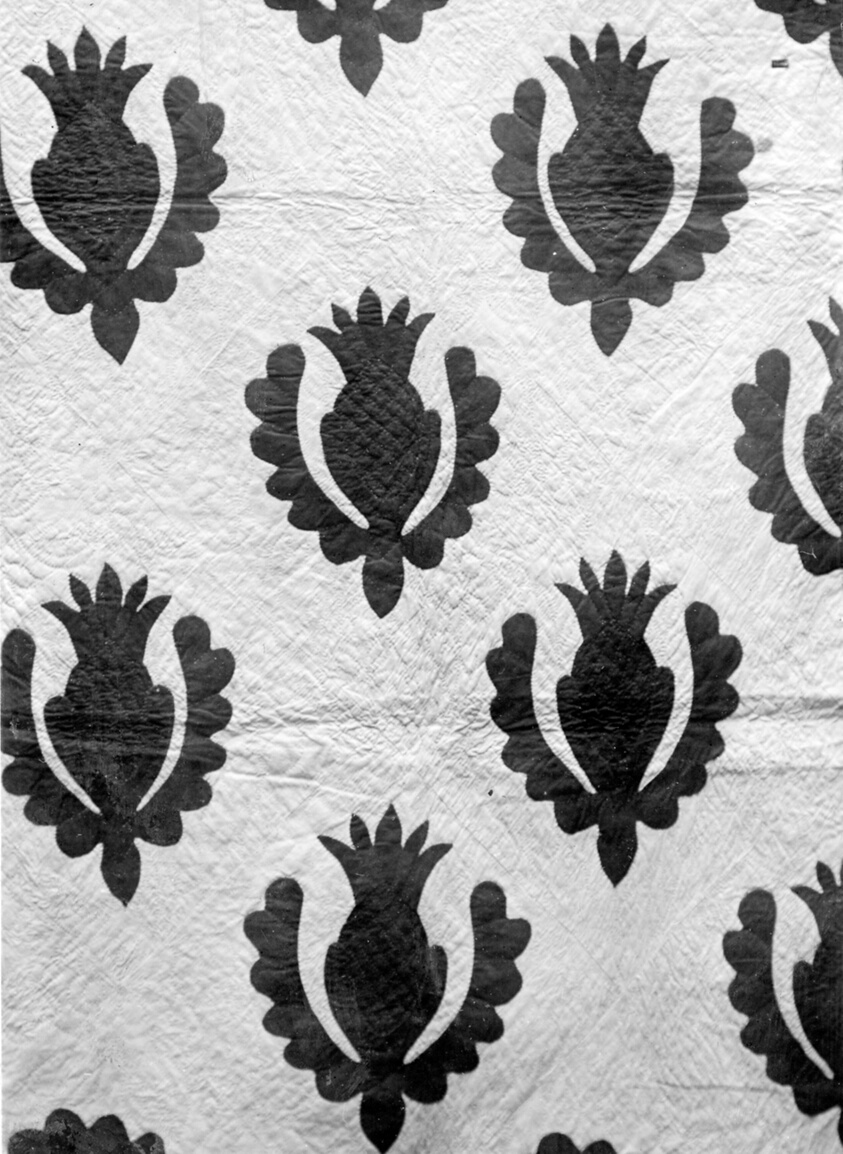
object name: Textile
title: Bedcover (Pineapple Quilt)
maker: United States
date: c. 1852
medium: Applique, green and red on 21 blocks and quilting done in floral designs and square diamonds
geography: United States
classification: textile; needlework - quilt; needlework (visual works)